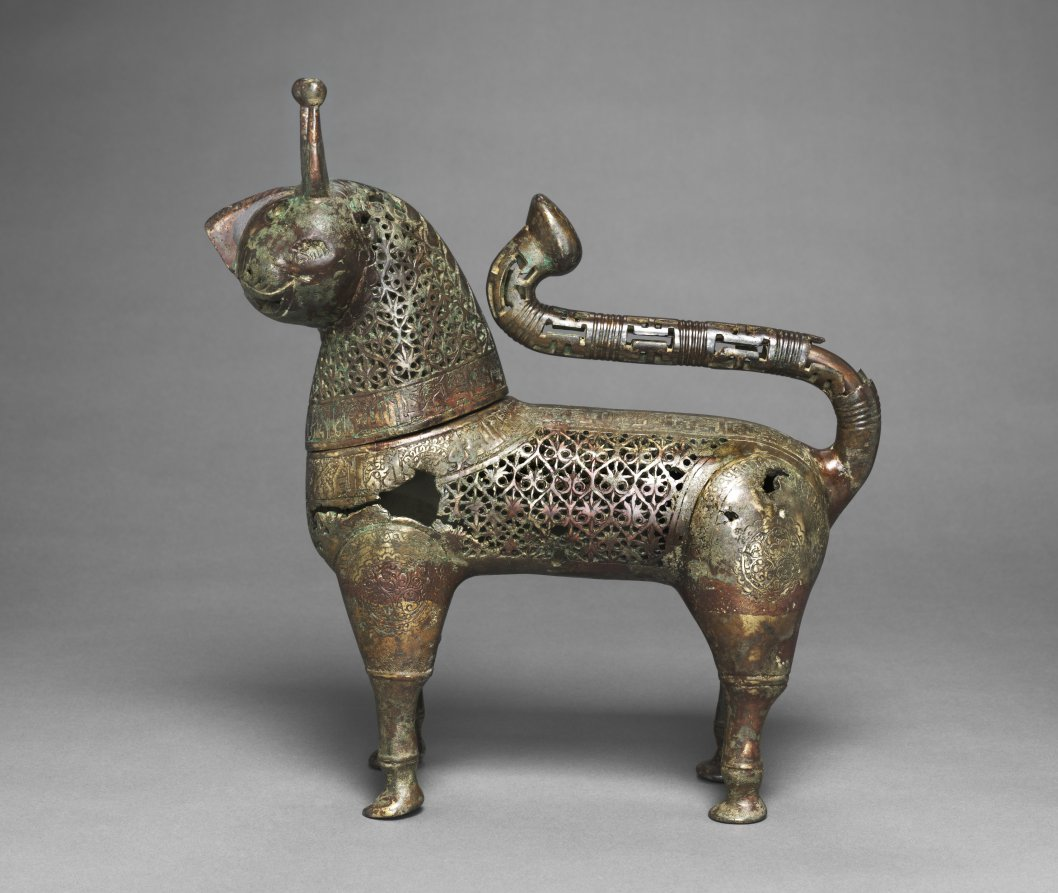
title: Feline Incense Burner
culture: Iran, Khurasan, Seljuq period of Iran (1037–1194)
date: 1150–1200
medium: Copper alloy, cast, engraved, chased, and pierced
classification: Metalwork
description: In Iran during the 1000s and 1100s, vessels in the shape of animals gained popularity, especially as incense burners. Felines were favored in Persian art and this piece may represent a caracal, a type of lynx. The head of the creature was cast separately and is removable to fill its body with hot coals and incense. Qur’anic verses on the neck and spine remind worshippers to set work aside, attend prayer, and then disperse to seek God’s bounty. The diffusion of perfumed smoke through the burner’s pierced palmette design may have served as a sensorial reminder of this teaching.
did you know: Arabic inscriptions in Kufic script against a background of scrolling arabesques run along the back and neck of the feline form.